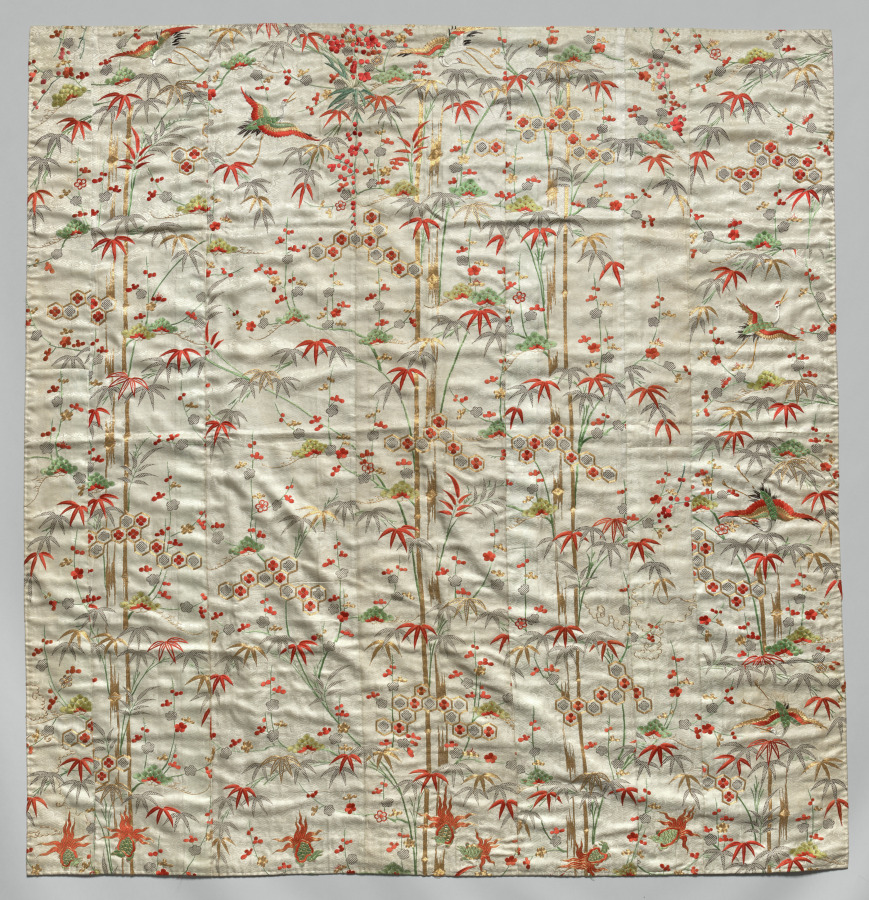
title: Hanging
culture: Japan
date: mid-1700s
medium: silk, embroidered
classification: Embroidery